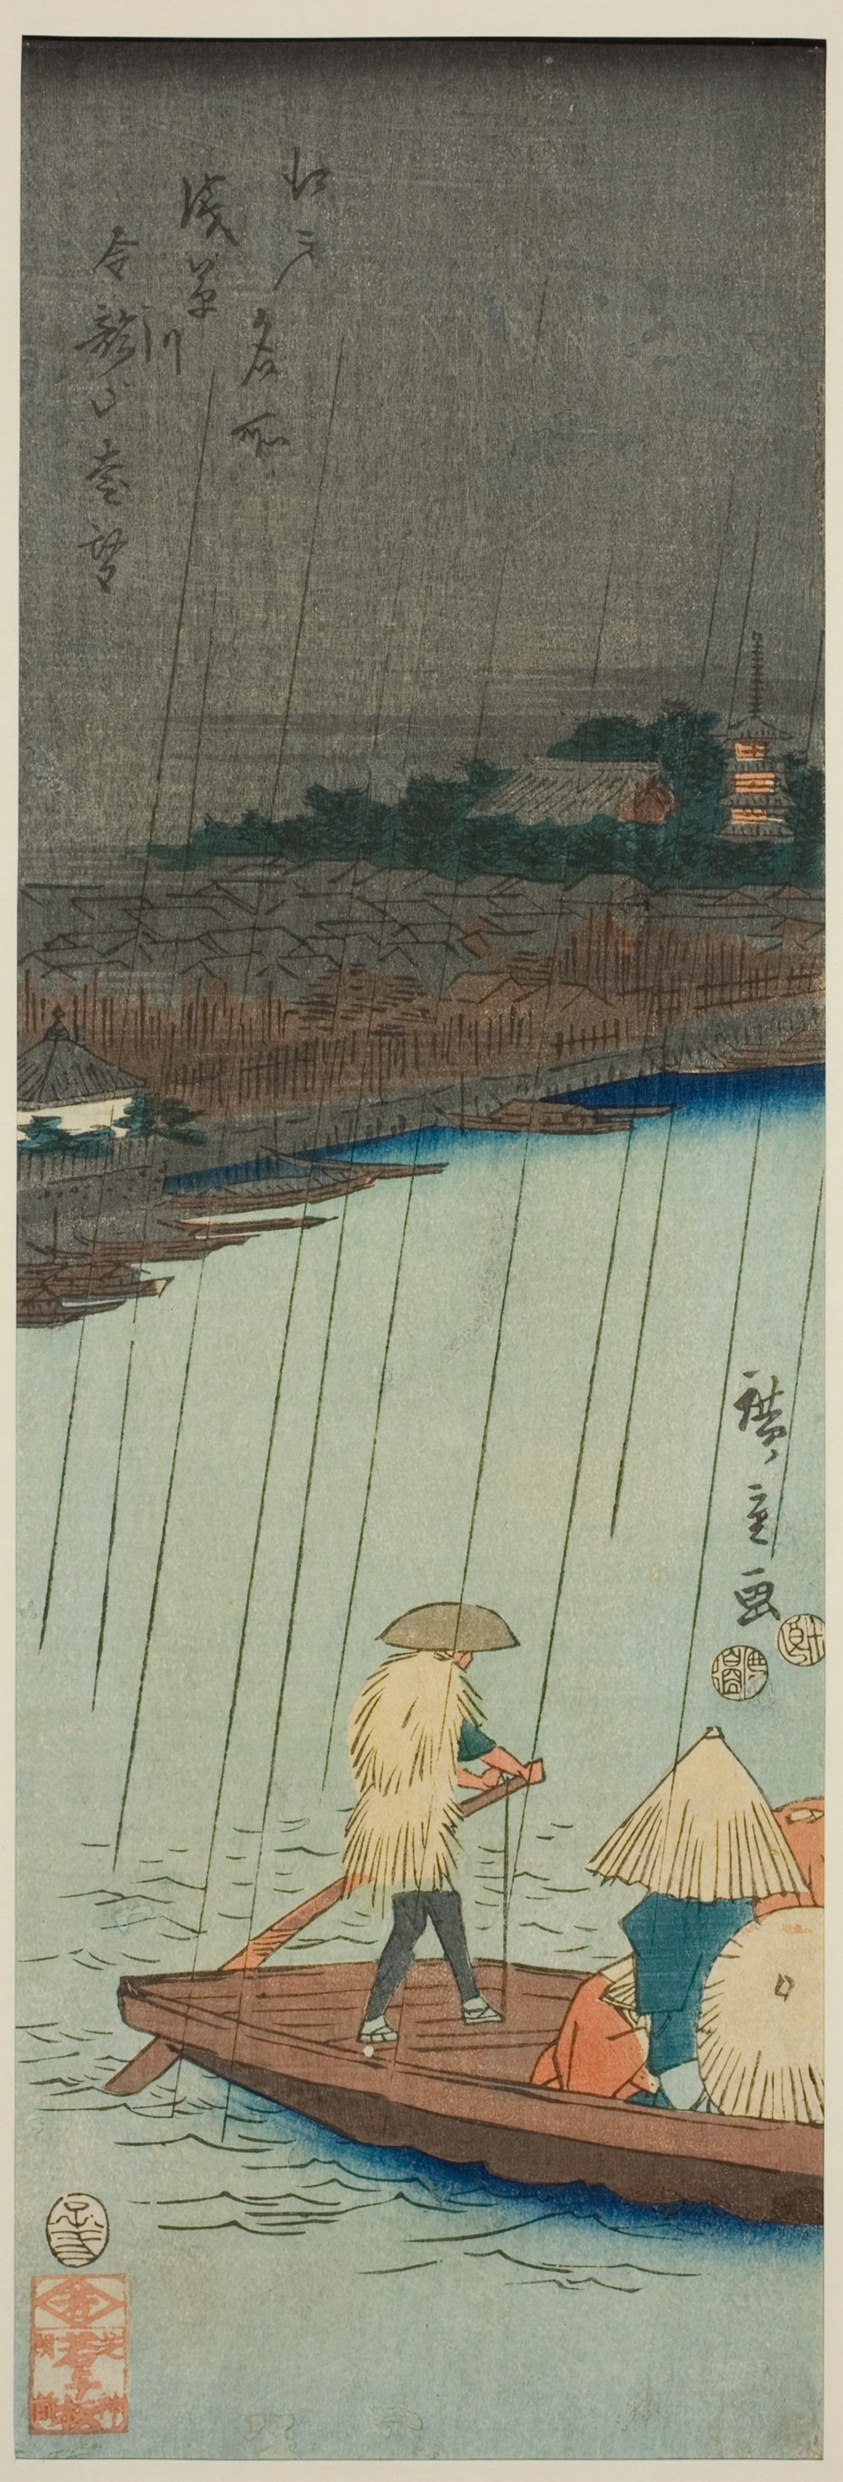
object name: Print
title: Distant View of Kinryuzan Temple from Asakusa River, from the series "Famous Places in Edo (Edo meisho)"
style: Japanese (culture or style)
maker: Utagawa Hiroshige 歌川 広重; Japanese, 1797-1858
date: 1852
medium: Color woodblock print, chu-tanzaku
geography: Japan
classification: woodblock print; print; asian art